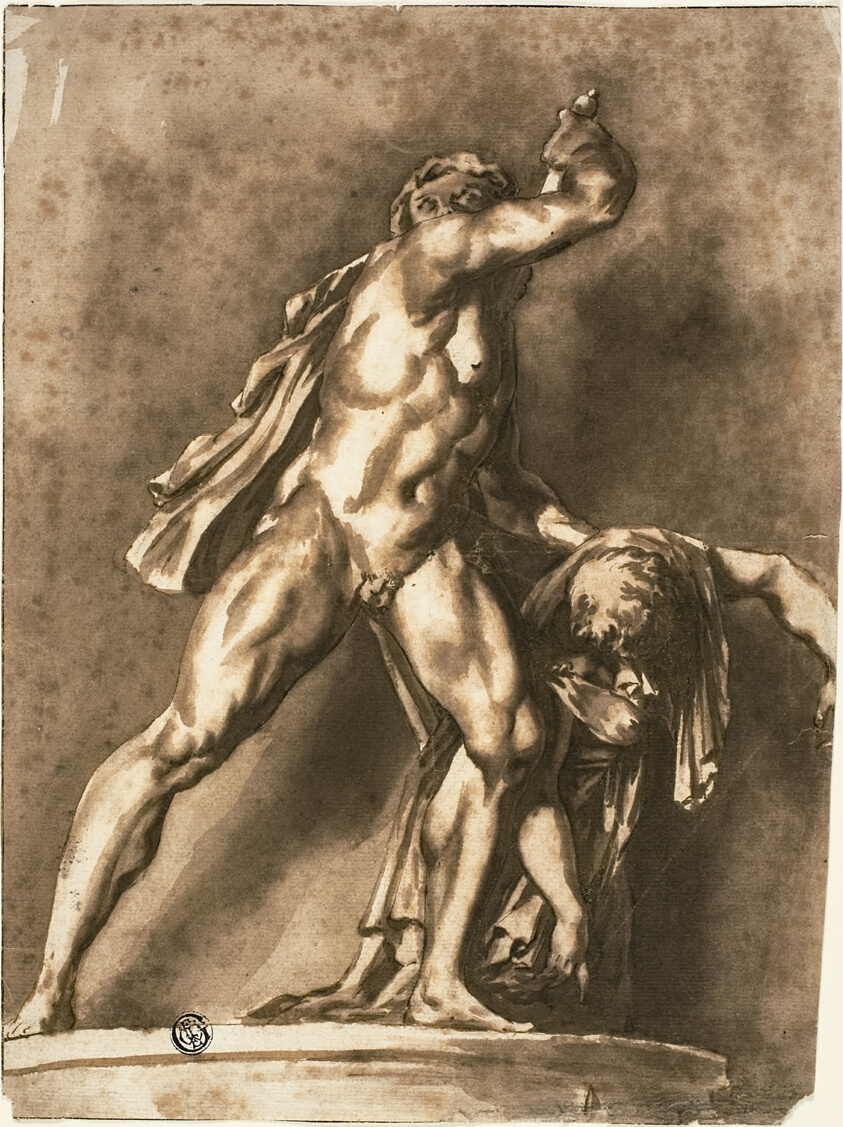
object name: Drawing and Watercolor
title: Study after The Dying Gaul Killing His Wife and Himself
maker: Probably Jan de Bisschop (Dutch, c. 1628-1671); or possibly Henry Bone, R.A. (English, 1755-1834)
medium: Pen and brown ink, with brush and brown wash, over traces of black chalk, on ivory laid paper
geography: Holland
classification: ink or chalk wash; drawings (visual works); prints and drawing